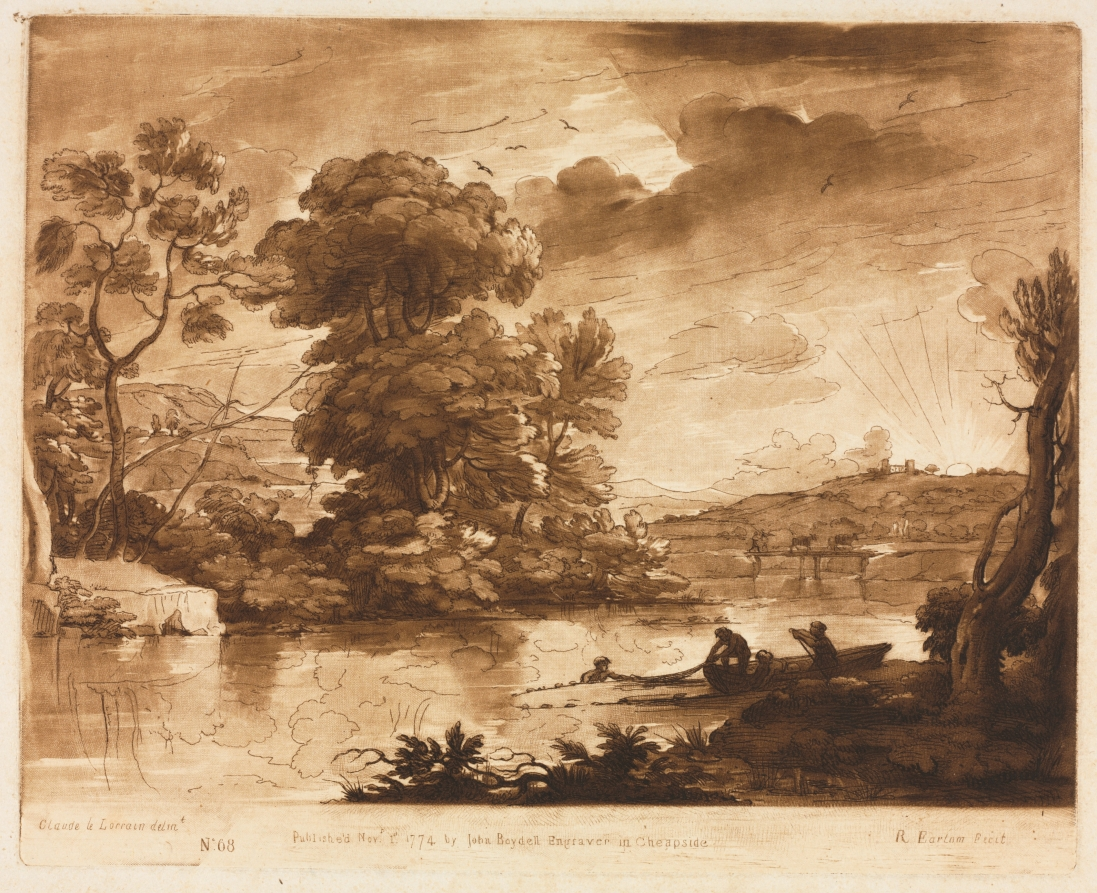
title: Liber Veritatis: No. 68, A Landscape at Sunset with Fishermen Drawing a Net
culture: England, 18th century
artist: Richard Earlom (British, 1743–1822)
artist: after Claude Lorrain (French, 1604–1682)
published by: John Boydell (British, 1720–1804)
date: 1774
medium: etching and mezzotint printed in brown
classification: Print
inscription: inscribed lower margin in plate: From the Original Drawing, in the collection of the Duke of Devonshire (according to JB "scratched plate")